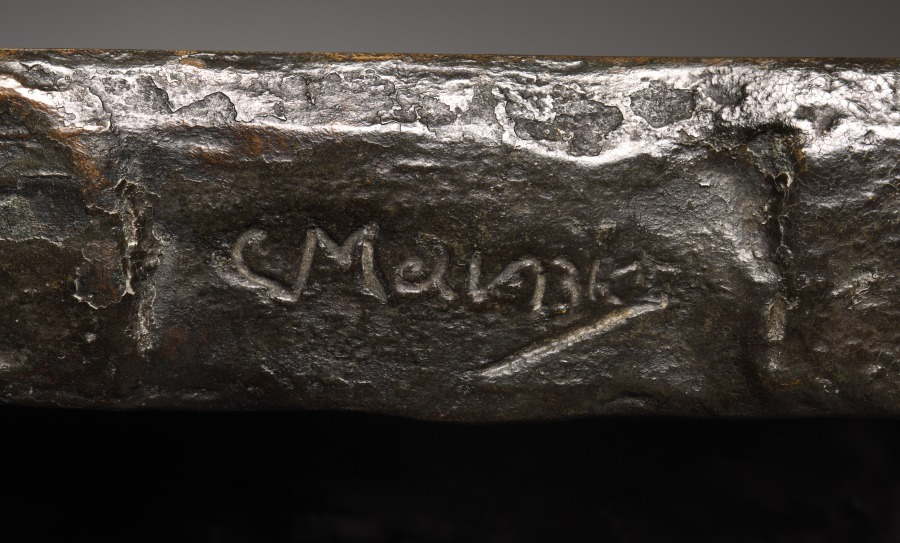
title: The Furnace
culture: Belgium, 19th century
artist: Constantin Meunier (Belgian, 1831–1905)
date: c. 1890 – 1900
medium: bronze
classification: Sculpture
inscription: Signed lower right side: "C. Meunier"; inscribed lower right: "B. Verbeyot, Fondeur, Bruxelles."